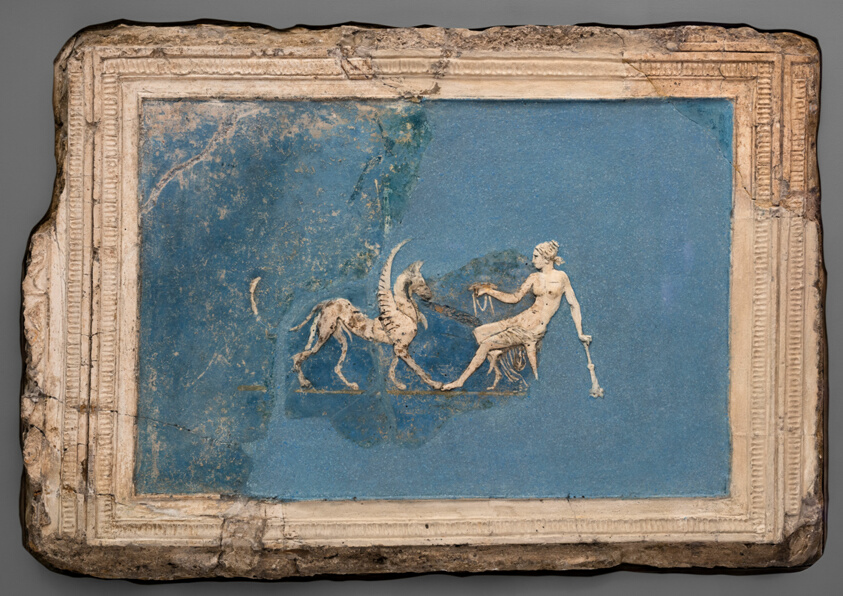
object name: Architectural fragment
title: Relief Fragments Depicting a Seated Woman and a Griffin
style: roman (ancient, style or period), ancient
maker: Roman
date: Early 1st century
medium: Stucco, pigment, and gold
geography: Italy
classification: stuccowork; sculpture; ancient art; architectural fragment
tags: mythology